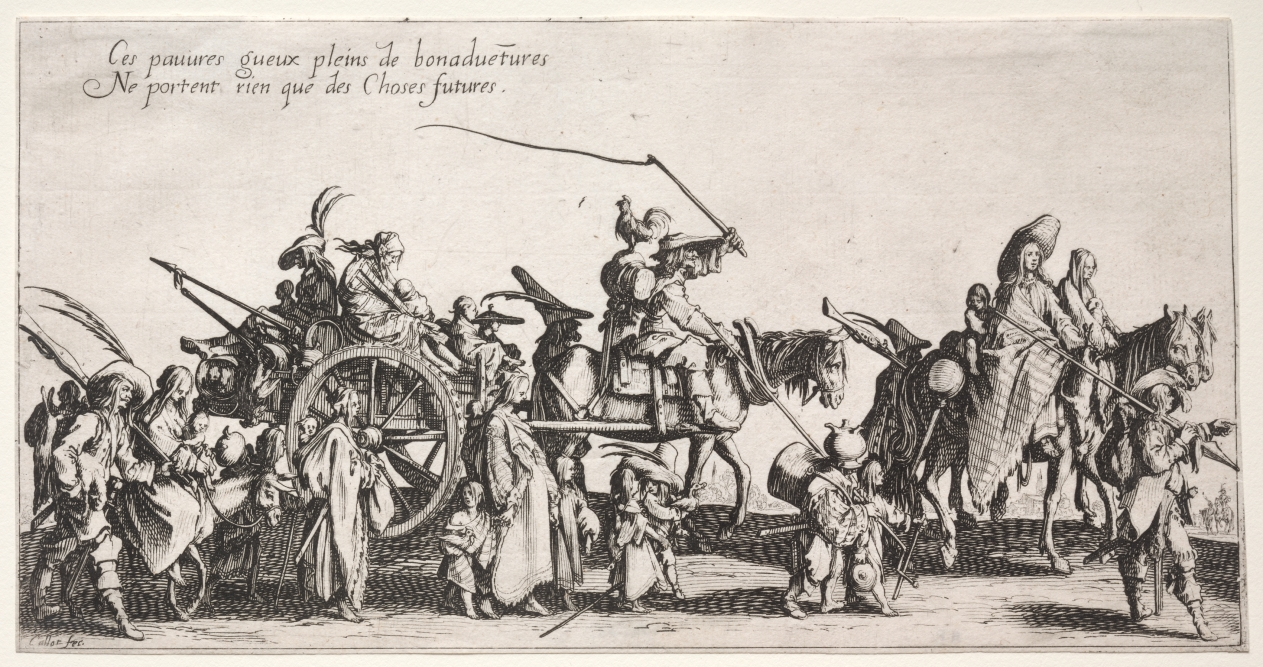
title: The Bohemians: The Bohemians Marching: The Rear Guard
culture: France, 17th century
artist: Jacques Callot (French, 1592–1635)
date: c. 1621–1625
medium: etching and engraving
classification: Print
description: Jacques Callot, a masterful draftsman, spent the greater part of his life at the ducal courts of Tuscany and Lorraine, where he produced prints to record festivals and theatrical performances. He also executed religious subjects and scenes reflecting many aspects of daily life including war, pervasive in 17th-century Europe. When returning to France from Italy, Callot probably saw bands of rootless men, women, and children-a common sight-which became the subject of The Bohemians. He conceived of these four prints as a long frieze; the lines in each of the sheets extend into the sheet that follows. The first two scenes depict a procession of scrawny horses and disheveled families in tattered, exotic clothing. The last two show these vagrants pillaging a farm and then enjoying a feast. The inscriptions, from left to right, comment on the action: The only things these poor fortune-telling beggars carry with them are things yet to come. Are these not fine messengers, straying through foreign lands? You who take pleasure in their words, watch out for your blancs, testons and pitolles (coins). When all is said and done, they find that their fate is to have come from Egypt to this feast.